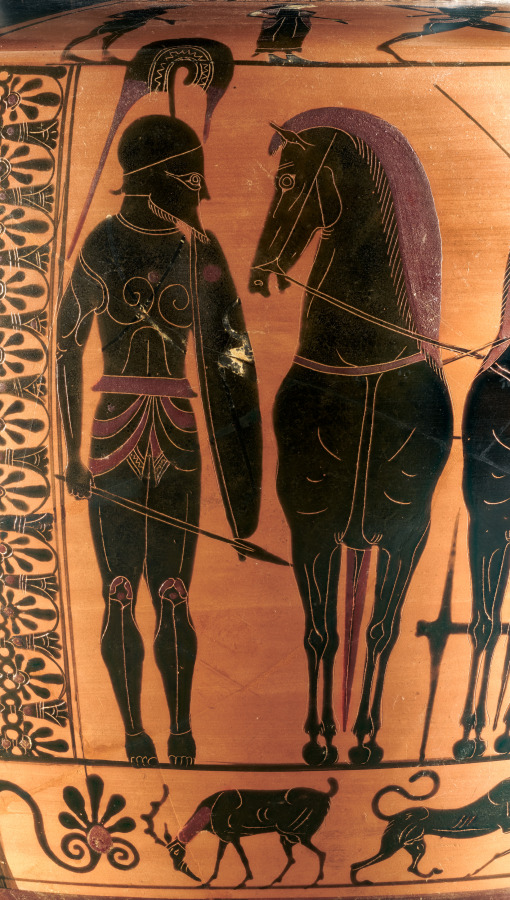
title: Black-Figure Hydria (Water Vessel): Frontal Quadriga (Body); Theseus and Minotaur (Shoulder)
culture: Greece, Attic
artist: attributed to Antimenes Painter (Greek, Attic, active c. 530–510 BCE)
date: c. 520 BCE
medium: ceramic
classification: Ceramic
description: Although their subjects differ, the three fields of figured decoration on this vessel relate to one another metaphorically through the theme of victory. Just as Theseus defeats the Minotaur on the shoulder, two lions converge on a deer in the predella (the small, lowermost panel). In the largest panel, victory is still to come, presumably for all three warriors shown: one in the chariot behind his driver, and one on foot on either side. Somewhat unusually, two of the warriors look directly out at the viewer, their frontal faces an interesting complement to the much more common frontal chariot.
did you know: This type of water vessel, a hydria, takes its name from hudor, Greek for water (and still familiar in the English root hydro).